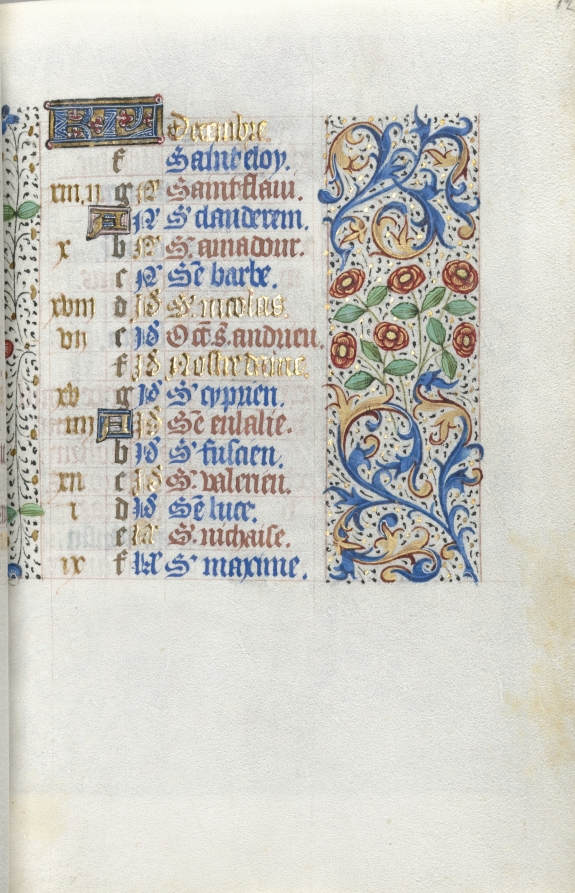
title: Book of Hours (Use of Rouen): fol. 12r, Calendar Page for December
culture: France, Rouen, 15th century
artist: Master of the Geneva Latini (French, active Rouen, 1460–80)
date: c. 1470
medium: ink, tempera, and gold on vellum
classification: Bound Volume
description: The rubric, or red text, of the recto (right) page says Secundum Iohanne, or Gospel of John, indicating the gospel lessons’ beginning. The page is enhanced with an image of the four evangelists writing the Gospels. At top left is John, with an eagle, writing while the devil tries to thwart him by stealing his inkwell. Beside this is Matthew, at a traditional desk, an angel kneeling nearby. In the next row are Mark with a lion and Luke with an ox. The preceding page includes the calendar’s end, December, with a cluster of gold days for the Christmas season.